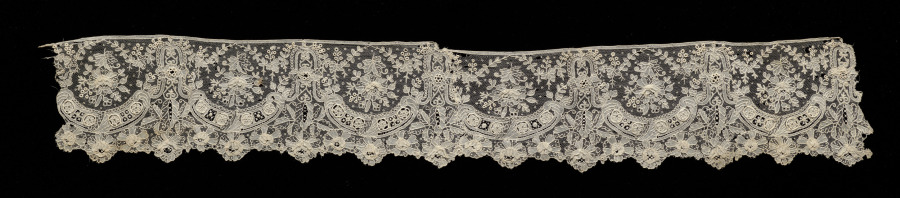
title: Lace Strip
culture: Belgium, Brussels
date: 1800s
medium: Needle lace (point de gaze)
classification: Lace